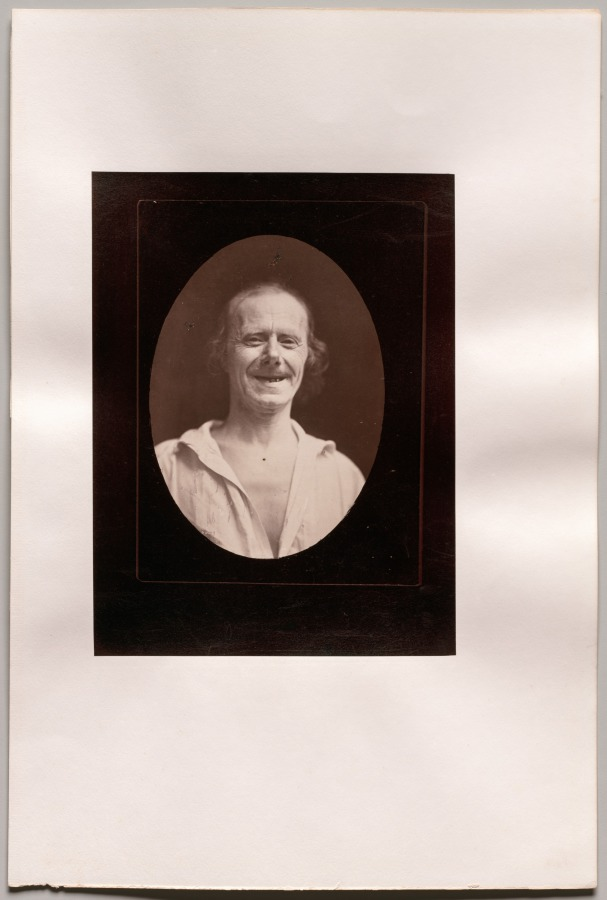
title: Figure 32: Natural laughter by the voluntary contraction of the two large zygomatics and the lower palpebral orbicularis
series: The Mechanism of Human Physiognomy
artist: Guillaume-Benjamin-Amand Duchenne (de Boulogne) (French, 1806–1875)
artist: Adrien Tournachon (French, 1825–1903)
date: c. 1856, printed 1862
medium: Albumen print from glass plate negative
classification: Photograph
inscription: On the verso, lower left, in graphite, “fig. 32”.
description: Duchenne embarked on the first scientific, systematic exploration of the physiology of human facial expression and hoped, through photographs of the experiments, to teach artists how to portray those emotions. Here, he has photographed a subject’s natural smile and described the muscles creating it. In subsequent photographs, he used an electrode to contract one of the muscles that convey that same emotion.